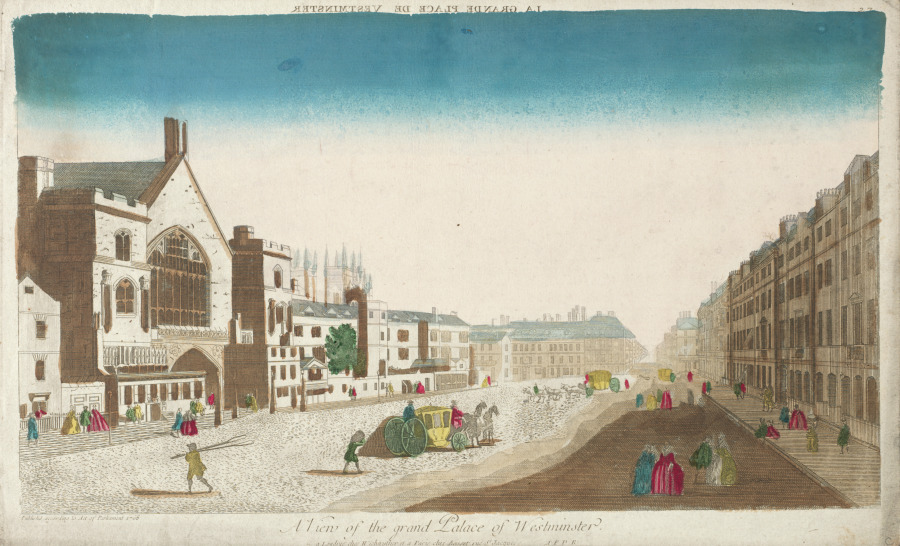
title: Palace of Westminster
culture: England, 18th century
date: 1706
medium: Hand-colored engraving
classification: Print